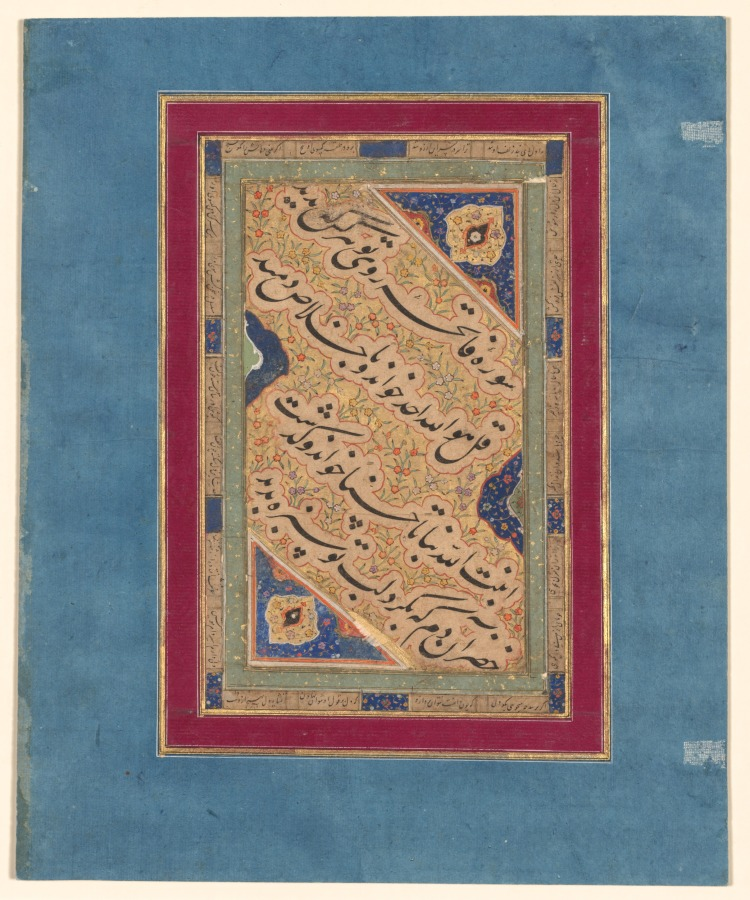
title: Calligraphy of Lyrical Quatrains (verso)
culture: Mughal India, probably Lucknow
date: mid-1700s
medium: Gum tempera, ink, and gold on paper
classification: Calligraphy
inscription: verso: Persian verses in nasta‘liq script. Whoever set eyes on the Opening Verses of your face recited “Say He is the Only God” and breathed it out in pure sincerity./ “God has made her grow in purity and beauty,” So recited and passed by Khizr, the moment he saw the green [pubescent] sprouting around your lips.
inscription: verso: Persian verses in top horizontal border, right to left, in nasta‘liq script. My heart became shackled to her tresses;/ You have lost your head in fulfilling this desire./ Go and become entangled in her tresses./ If you see her mouth, do not say a word.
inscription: verso: Persian verses in bottom horizontal border, right to left, in nasta‘liq script. If she asks you what you desire, say “your heart.”/ Since once she knows it, one could never banish her from one’s heart./ For one cannot assure one’s heart based on her words of promise;/ It is not fitting that one should lose one’s heart for naught.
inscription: verso: Persian verses in right vertical border, top to bottom, in nasta‘liq script: From the anguished mood and state of this sorrowful heart,/ Narrate down the story as you brush down her tresses [conjectural]/ Of me, in an unfit state, shackled and in chains/ How I fare in that stifling prison./ If you go and seek her out in that abode/ Once you find her, you should say of me, the heartbroken.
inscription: verso: Persian verses in left vertical border, bottom to top, in nasta‘liq script: I have a heart ensnared by her tresses/ Exiled in foreign lands [. . .] of her tresses/ The tale of this broken-hearted soul, like disheveled hair/ Bring to her ears in a well-composed manner, like well-arranged hair/ Enchain her tresses in your speech/ Brush her locks behind her for a while.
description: Floral sprigs illuminate the central calligraphic work, and paired verses have been written in smaller script all around the border. All the verses are about the beauty of—and longing for—the beloved.